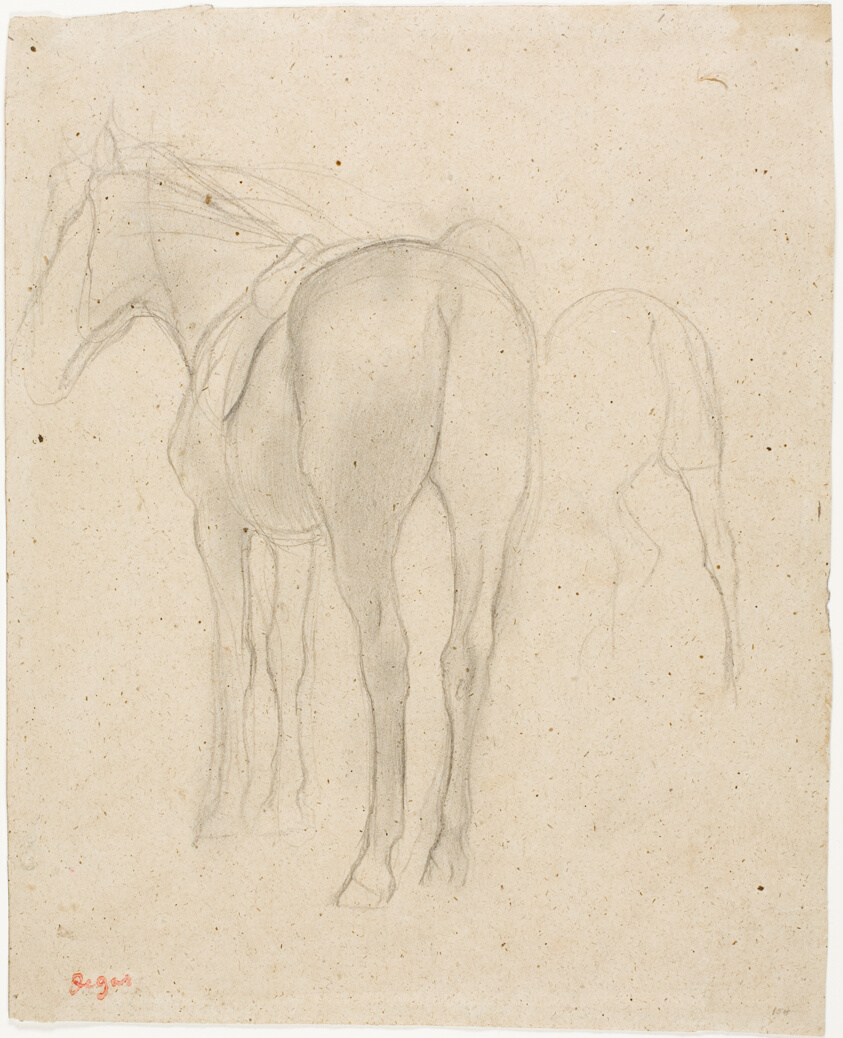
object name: Drawing and Watercolor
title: Studies of a Horse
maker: Edgar Degas; French, 1834-1917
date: 1868/75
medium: Graphite with stumping on tan wove paper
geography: France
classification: graphite; drawings (visual works); prints and drawing; paper